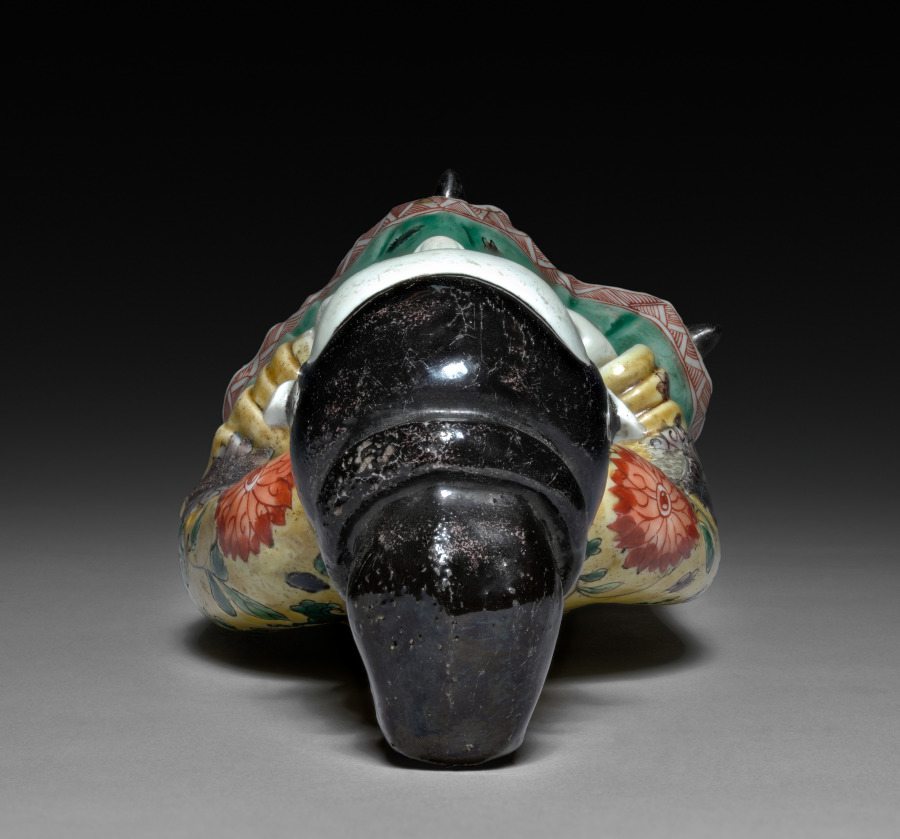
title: Court Lady Holding a Sheng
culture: China, Jiangxi province, Jingdezhen kilns, Qing dynasty (1644-1911), Kangxi reign (1662-1722)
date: 1662–1722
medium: porcelain with famille verte overglaze enamel decoration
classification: Ceramic